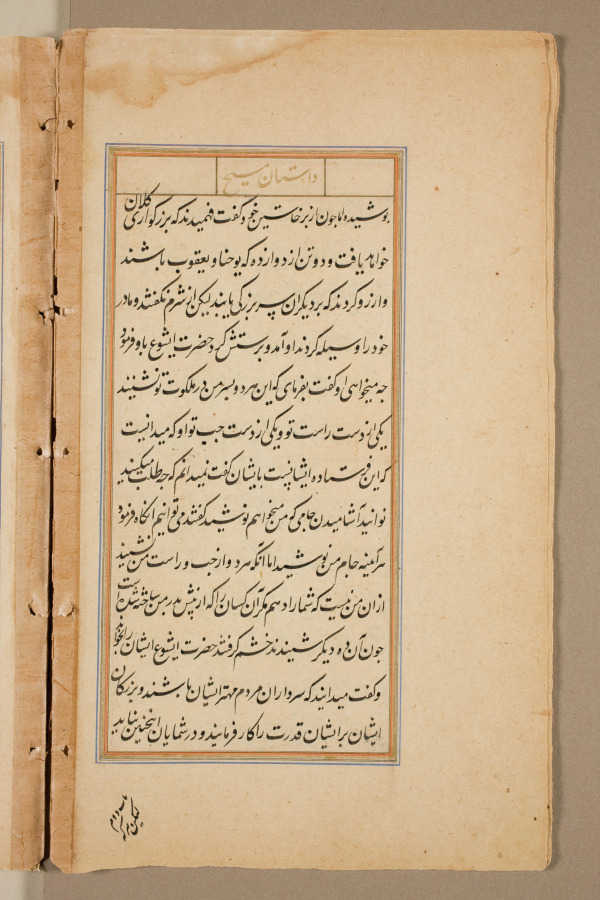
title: Text page from a Mirror of Holiness (Mir’at al-quds) of Father Jerome Xavier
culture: Mughal India, Allahabad, made for Prince Salim (1569–1627)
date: 1602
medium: Ink and gold on paper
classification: Manuscript